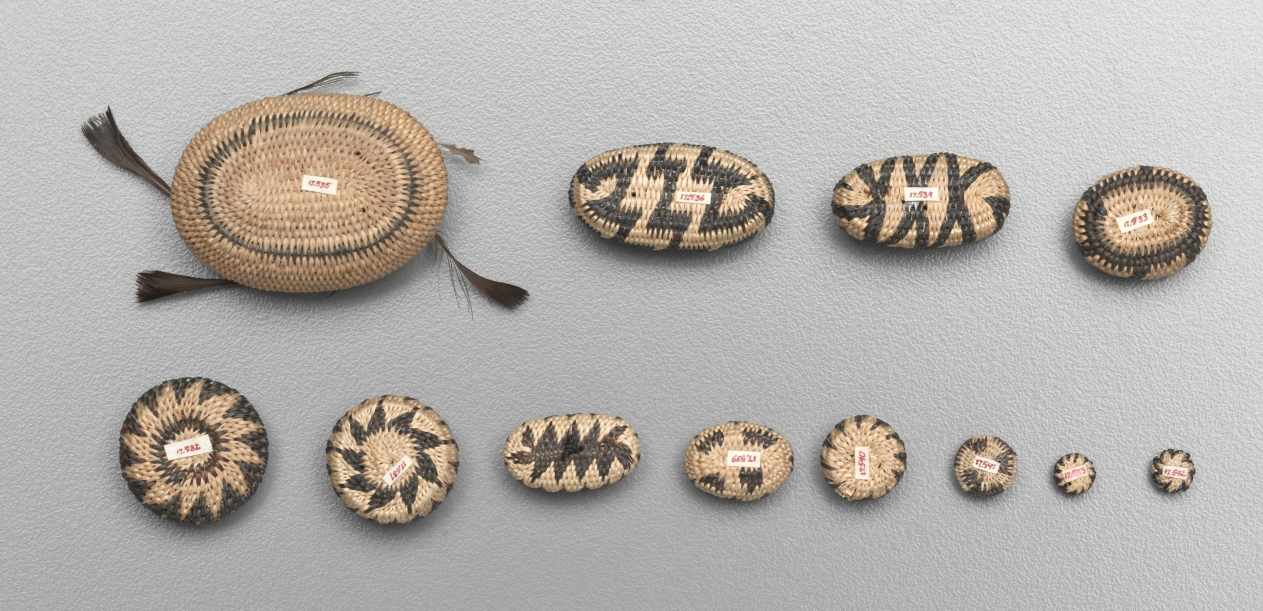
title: Miniature Round Basket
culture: California, Pomo, late 19th-early 20th century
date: late 1800s-early 1900s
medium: plant materials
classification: Basketry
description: Miniature baskets were made to demonstrate the basket-maker’s virtuoso skill, and these tiny marvels seem to be no exception—the smallest are only five millimeters wide but still patterned. For such fine work, dexterity was required as much for preparation of materials as for weaving.